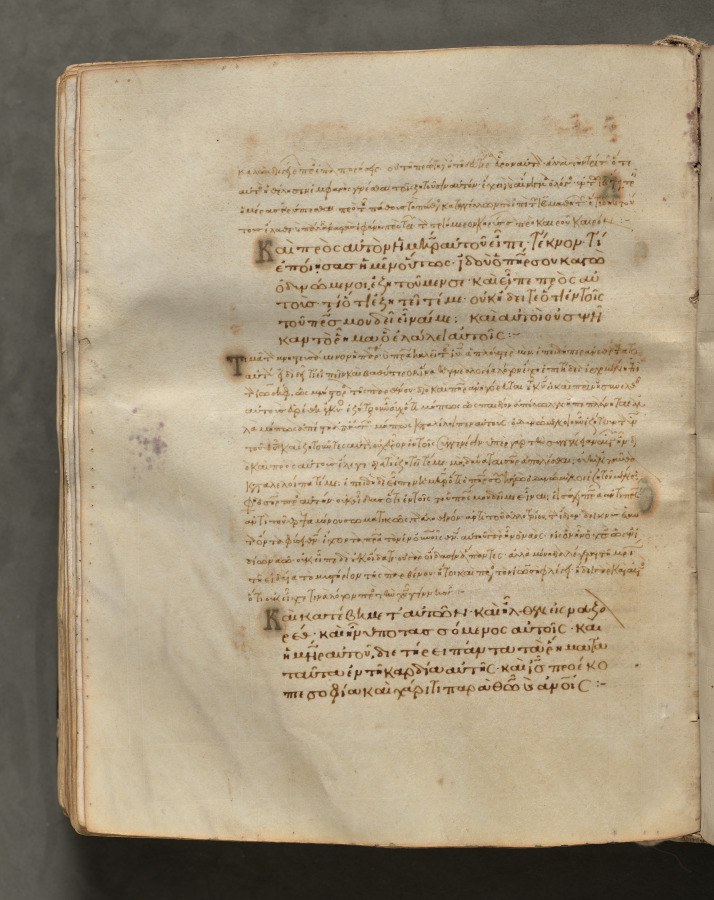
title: Text, folio 212 (verso), from a Gospel Book with Commentaries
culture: Byzantium, Constantinople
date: c. 1000–1100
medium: ink, tempera, and gold on vellum; leather binding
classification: Bound Volume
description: Each of the four gospels in this book opens on a page with brilliantly illuminated borders depicting the author of the text as well as birds-principally peacocks, symbols of the immortality of the soul-and fountains, representing the fountain of life and the salvation of the soul. This volume consists of 428 leaves with texts in Greek. Its level of sophistication suggests that it was probably written and decorated in a monastery in Constantinople.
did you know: Gospel Books were carried in procession through Byzantine churches.